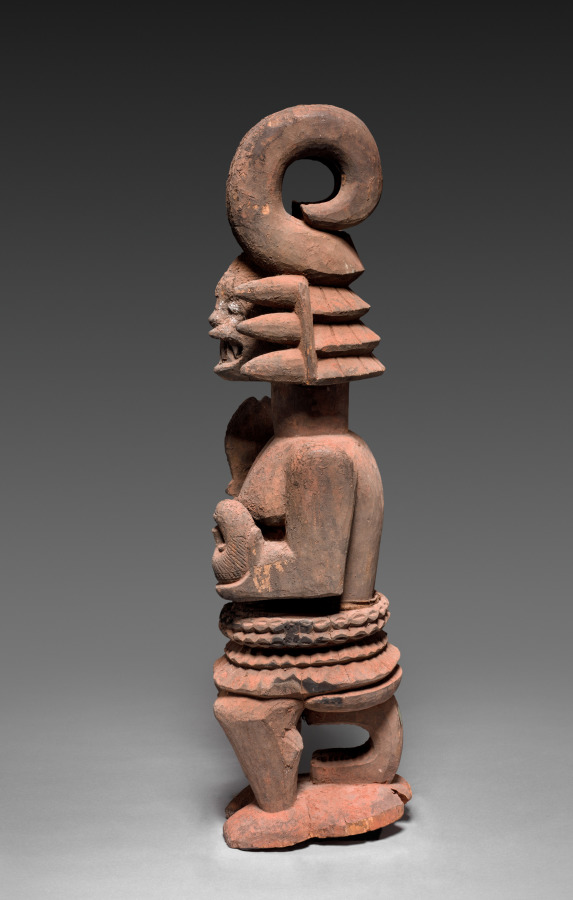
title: Shrine Figure (Ikenga)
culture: Africa, West Africa, Nigeria, Igbo carver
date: possibly early 1900s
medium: Wood, organic materials, and raffia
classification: Sculpture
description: This seated figure of a man holding a cutlass and an inverted human skull is a cult object called ikenga, associated with achievement and success. Standing at the center of a man’s personal shrine, the sculpture receives prayers and sacrifices in return for the ancestors’ guidance. An elaborate headdress comprising two horn-like extensions reinforces the cult’s preoccupation with masculinity, while facial incisions known as ichi refer to membership in one of many male associations.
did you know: This figure associated with achievement and success would have received prayers and sacrifices in return for the guidance of ancestors.